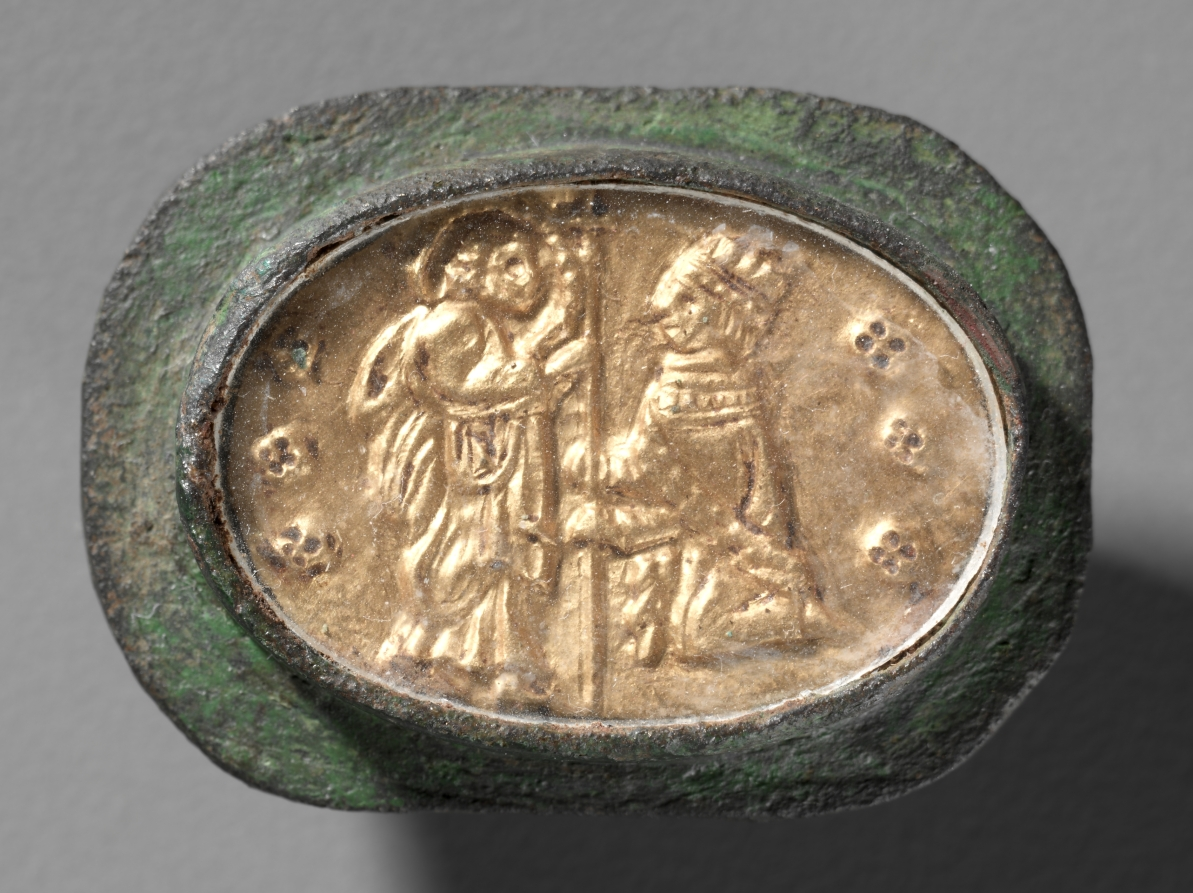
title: Votive or Civic Badge with a Crowned Figure Kneeling before Christ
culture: Italy, Venice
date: c. 1300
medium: gold repoussé medallion under glass inset within a bronze clasp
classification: Metalwork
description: This brooch was probably made to fasten a ceremonial cloak, and may have been intended as a diplomatic gift or memento. The central composition parallels the main face of the famous gold coin, a ducat, of the Venetian Doge Giovanni Dandolo minted in 1288-1289. Unlike the coin, the medallion is neither struck or diecast; it is tooled and chased, making it one of a kind.